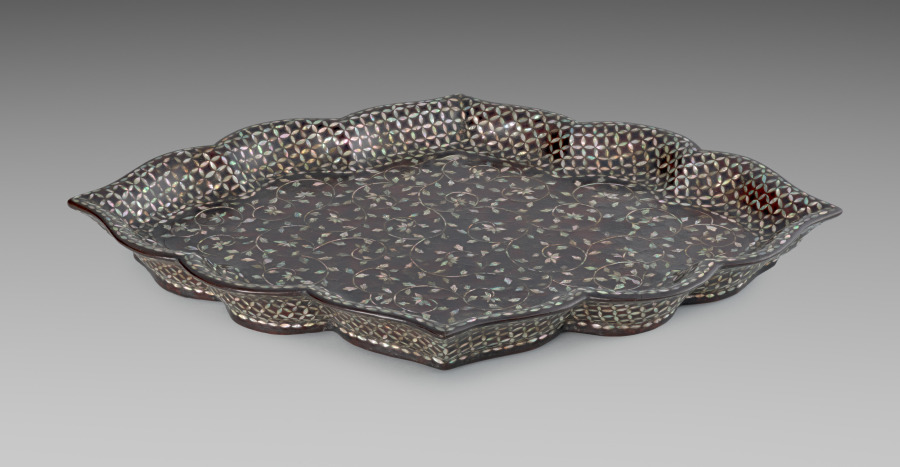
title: Foliate-Shaped Tray with Mother-of-Pearl Inlay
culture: Korea, Joseon dynasty (1392–1910)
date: late 1400s–early 1500s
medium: Inlaid abalone shells on black lacquer ground, applied with red lacquer on the interior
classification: Lacquer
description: Since the Goryeo dynasty, Korean mother-of-pearl lacquerware has been admired for its refinement, though few early examples survive. This tray, datable to the late 1400s or early 1500s, is exceptional for both rarity and condition. Its foliate form, peony vine motif, and intricate lattice border—originally derived from Goryeo-period decorative arts—are exquisitely reinterpreted through the refined craftsmanship of early Joseon artisans.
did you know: This tray’s intricately decorated surface was created through a labor-intensive inlay technique employing thin, precisely cut abalone shell.